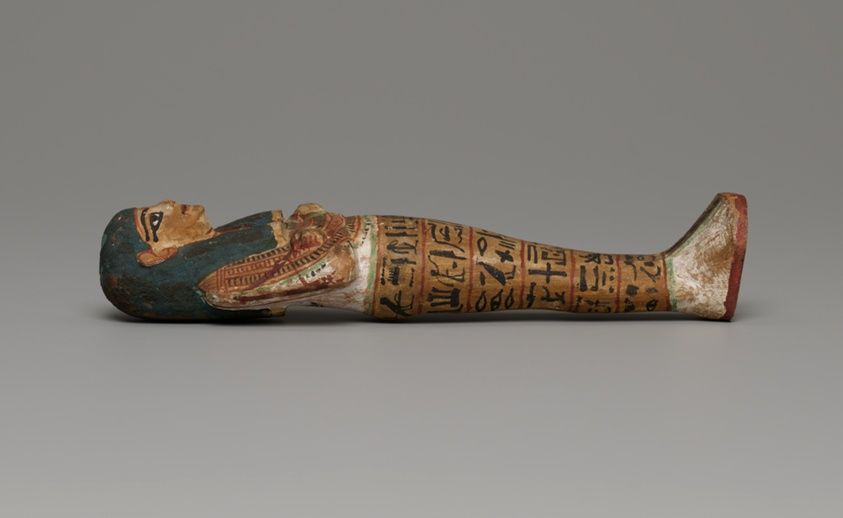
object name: Funerary Object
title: Shabti (Funerary Figurine) of Mayat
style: new kingdom, ancient, egyptian, nineteenth dynasty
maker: Egyptian; probably Thebes (modern Luxor), Egypt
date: New Kingdom, Dynasty 19 (about 1295–1186 BCE)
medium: Wood, gesso, and pigment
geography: Egypt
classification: ushabti; wood; funerary; figurine; ancient art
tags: funerary art, Hieroglyphs, mummies, women